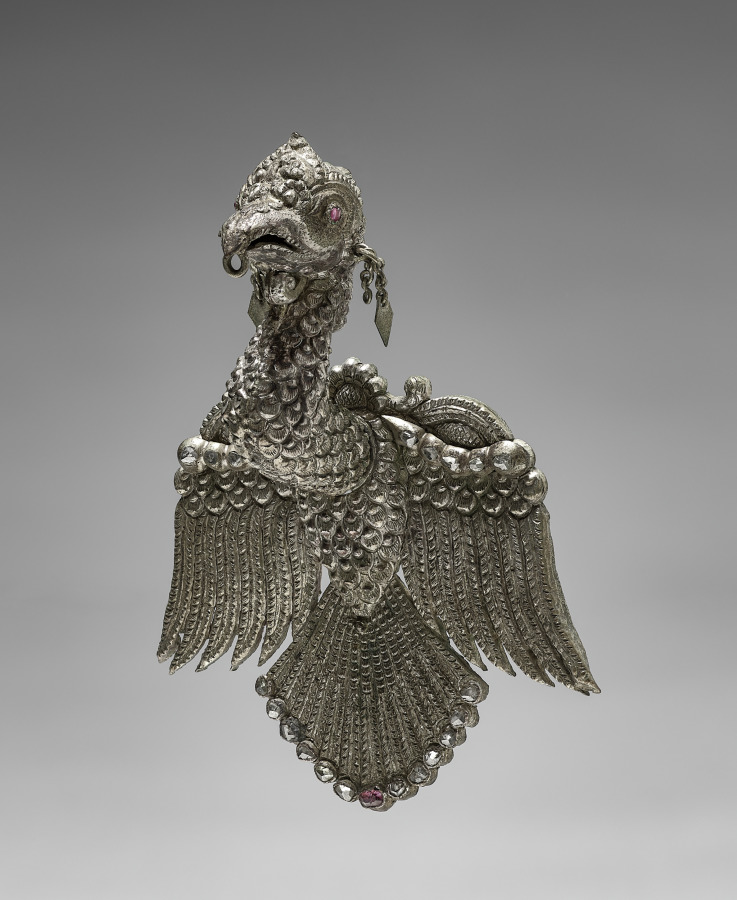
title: Hat Ornament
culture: Burma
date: 1800s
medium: silver and rubies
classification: Jewelry